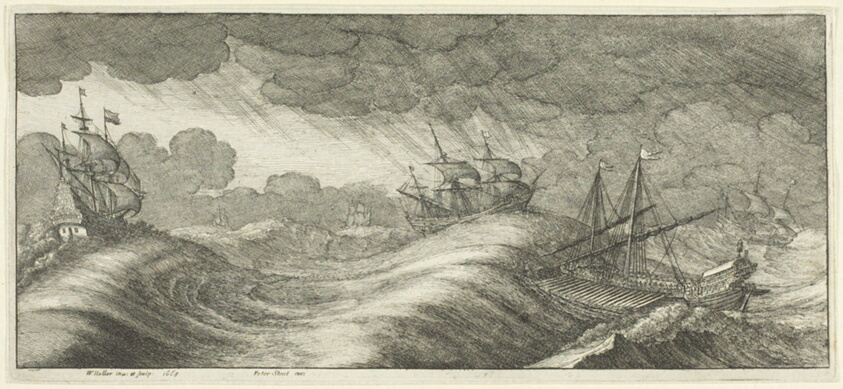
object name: Print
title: Galley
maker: Wenceslaus Hollar (Bohemian, 1607-1677)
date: 1665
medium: Etching on ivory laid paper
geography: Bohemia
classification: etching; print; prints and drawing